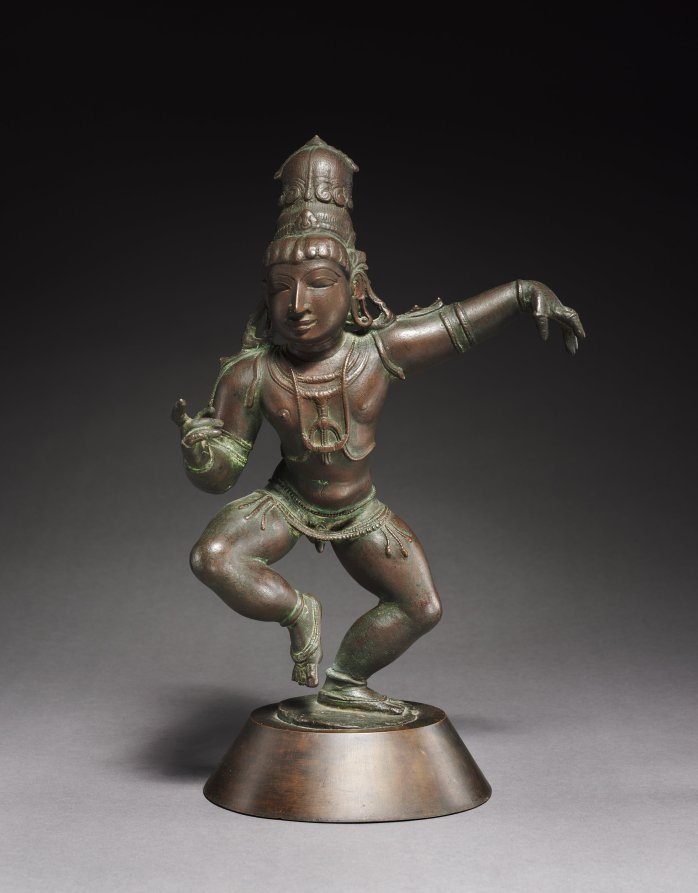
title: Dancing Child-Saint Sambandar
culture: South India, Vijayanagor period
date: c. 1300s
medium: bronze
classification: Sculpture